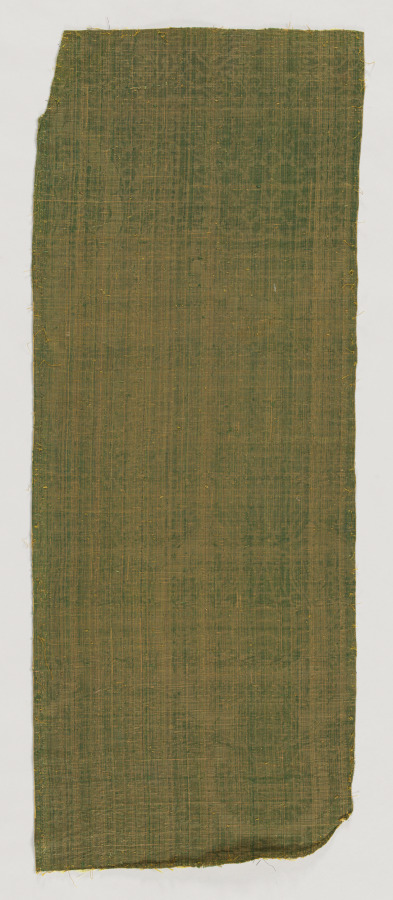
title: Velvet Fragments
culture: Spain, early 16th century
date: early 16th century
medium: velvet (cut, voided, and brocaded): silk and gold thread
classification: Velvet